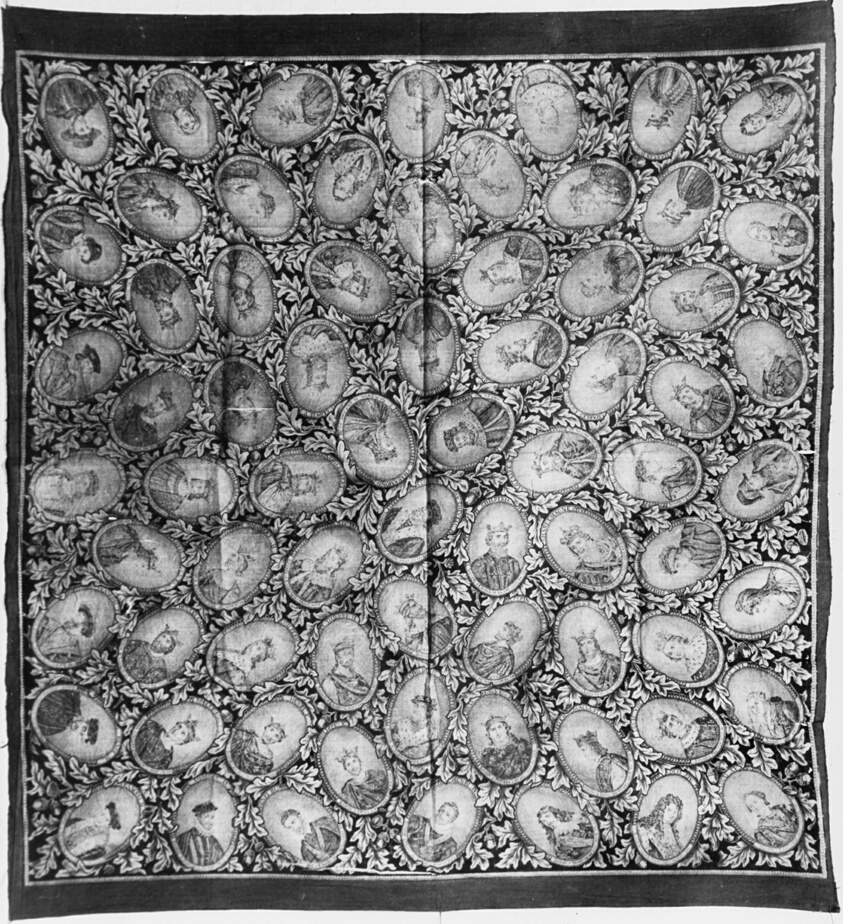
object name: Textile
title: Les Rois de France (The Kings of France) (Handkerchief)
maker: Engraved by Raimond Laverdin (French, active 1830) after Francois Seraphin Delpech (French, 1778-1825); Manufactured by Claude Arnaud Tizon (French, 1778-1825); France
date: 1845/47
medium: Cotton, plain weave; copperplate printed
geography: France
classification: textile; weaving - printed; costume accessory; accessories (object genre)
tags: propaganda